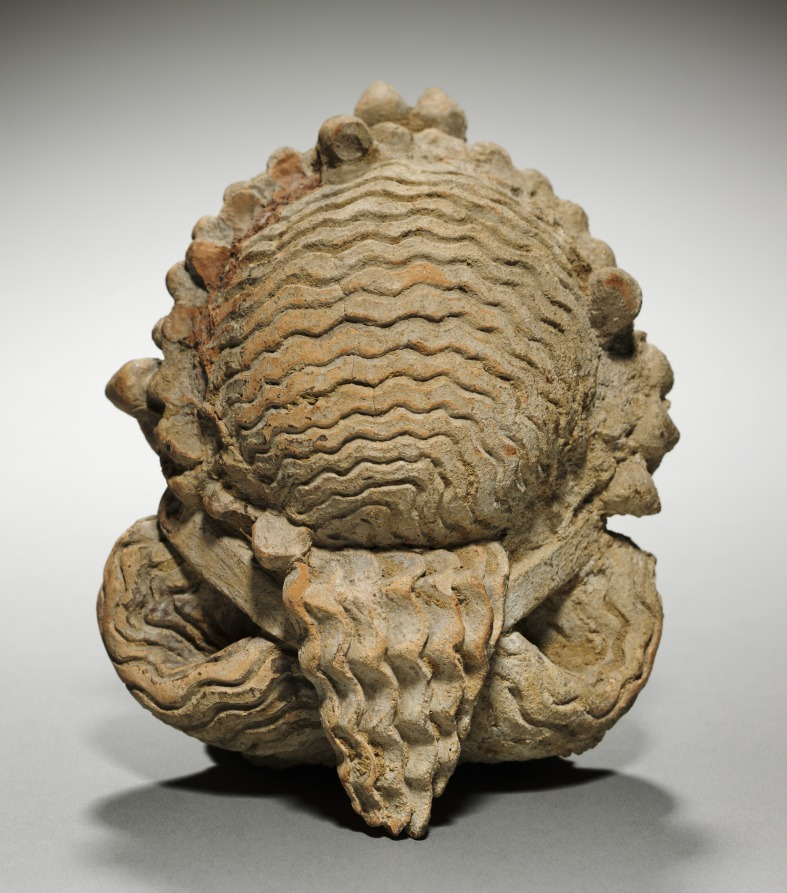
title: Head of Artemis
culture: Greece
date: 600–575 BCE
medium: terracotta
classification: Sculpture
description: Artemis was the goddess of hunting. Her long straight nose, almond-shaped eyes, and "archaic smile" are very similar to those of Atalanta on the contemporary white-ground lekythos (1966.114)